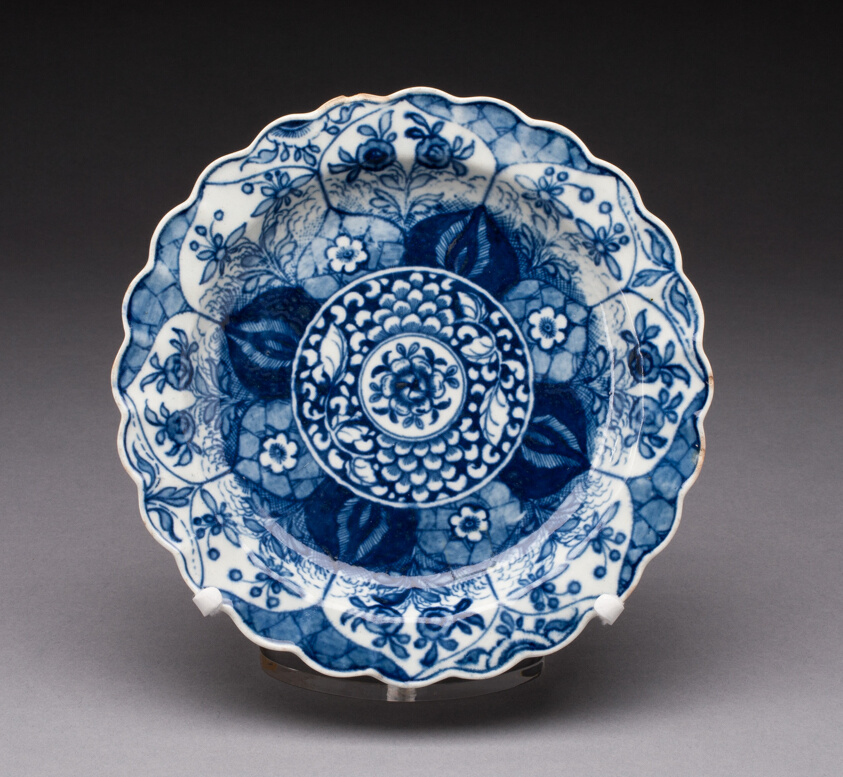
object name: Ceramics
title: Plate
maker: Worcester Porcelain Factory (Warmstry House Period, 1751–1783); Worcester, England, founded 1751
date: c. 1770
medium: Soft-paste porcelain with underglaze blue decoration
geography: Worcester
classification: plate (general, dish); tableware; dish (vessel); ceramics; porcelain; european decorative arts